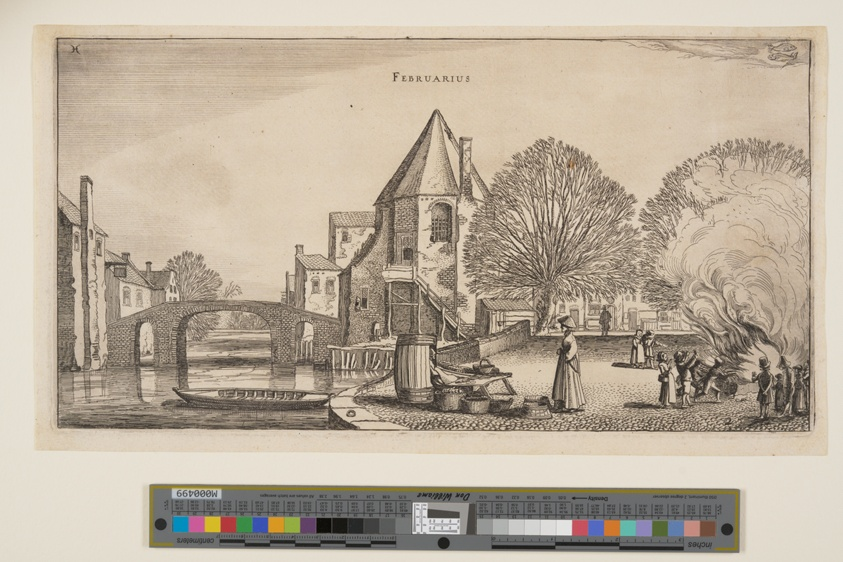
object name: Print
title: February, from The Twelve Months of the Year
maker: Jan van de Velde II (Dutch, c. 1593–1641); after Willem Buytewech (Dutch, c. 1591–1624)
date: 1616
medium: Etching on ivory laid paper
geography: Netherlands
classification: etching; paper; print; prints and drawing